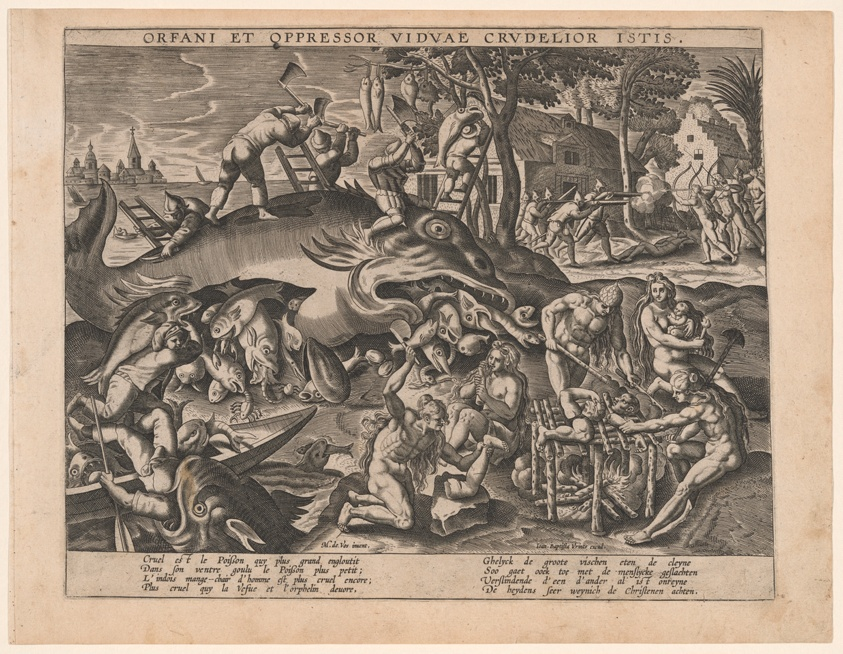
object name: Print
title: The Big Fish Eat the Small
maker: After Maarten de Vos (Flemish, 1532-1603); published by Joan Baptista Vrints (Flemish, active 1575-1612)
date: c. 1580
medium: Engraving in black on cream laid paper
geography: Flanders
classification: engraving; paper; print; prints and drawing